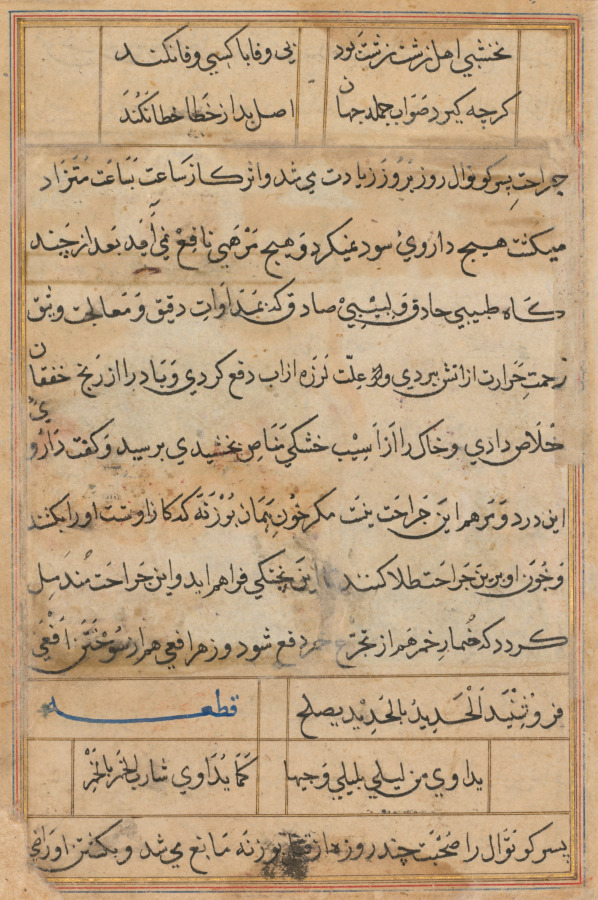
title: Page from Tales of a Parrot (Tuti-nama): text page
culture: Mughal India, court of Akbar (reigned 1556–1605)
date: c. 1560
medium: gum tempera, ink, and gold on paper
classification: Painting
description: The book of the Tuti-nama from which this page comes consists of 341 folios, or 682 pages. The 52 tales told by the parrot Tuti to his mistress Khujasta and the overarching frame story about Khujasta herself are all written in Persian. Here the form of the script is called naskh and is read from right to left. The word in blue means “cut,” which indicates that the prose narrative will cut to a poetic verse. The Tuti-nama was written in 1329–30 by a Persian-speaking Sufi scholar and author from Central Asia. He based it on an earlier Persian work that recast a collection of Sanskrit fables from ancient India and other Persian tales. The blending of cultures and ethnicities long pre-dated the Mughals in India.